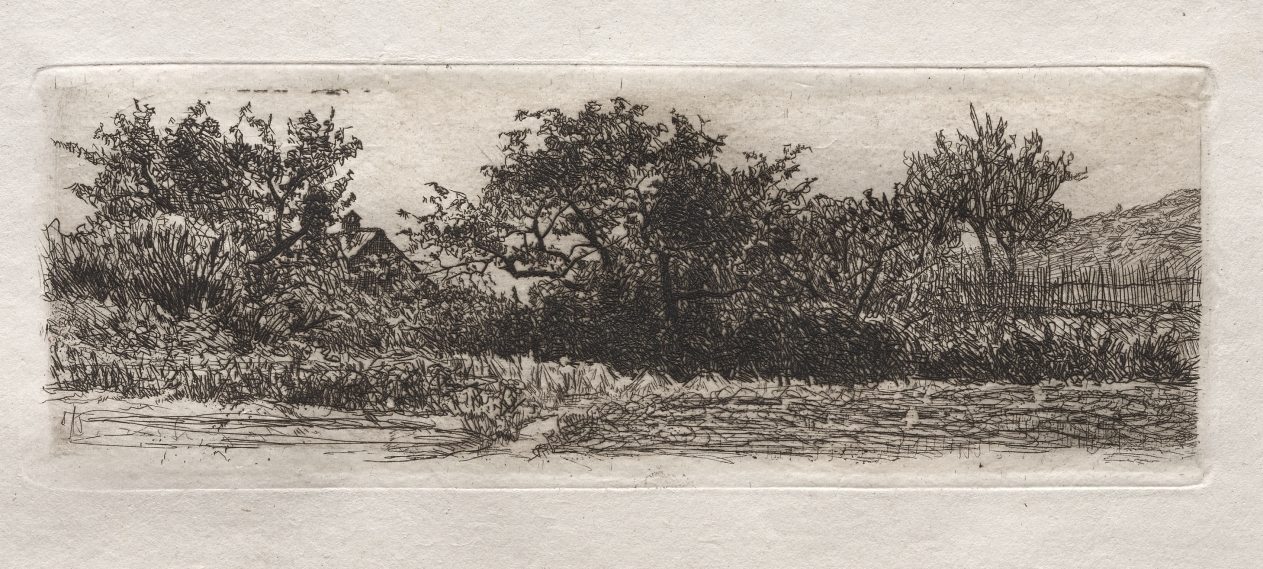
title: Roofs and Trees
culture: America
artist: Otto H. Bacher (American, 1856–1909)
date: 1879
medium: etching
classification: Print